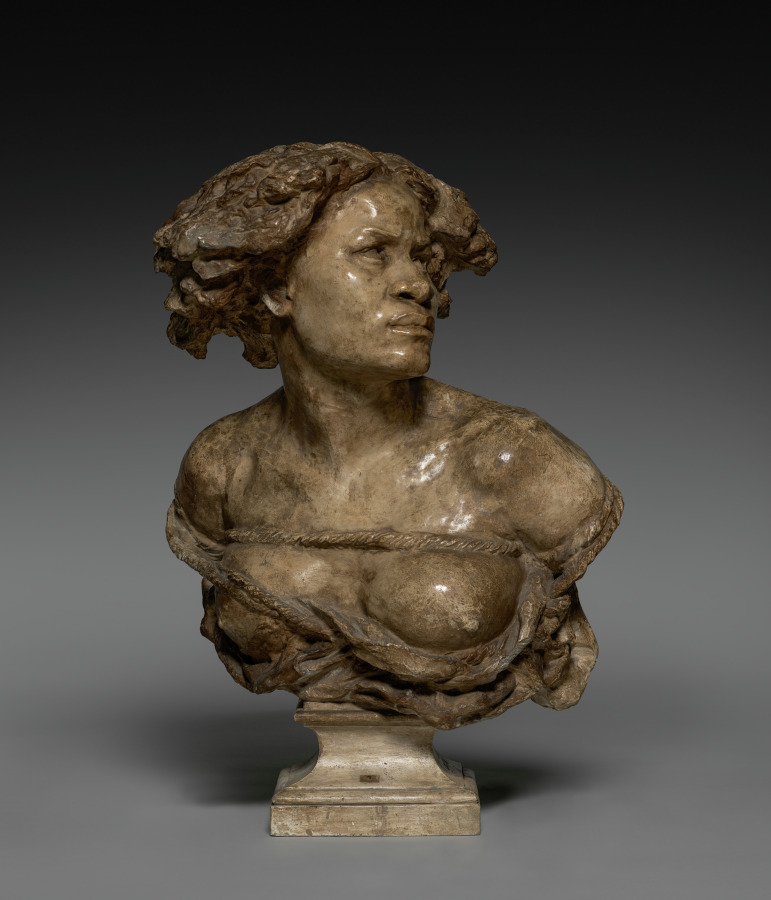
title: Why Born Enslaved!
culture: France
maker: Jean-Baptiste Carpeaux (French, 1827–1875)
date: 1867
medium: Plaster, original polychromed surface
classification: Sculpture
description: One of the most powerful expressions of abolitionist sentiment in the visual arts, Why Born Enslaved! depicts an African woman bound by ropes and looking defiantly upward. The ropes press painfully into her breasts; her torn blouse alludes to the violence responsible for her condition. The original, polychromed surface is covered with complex, nuanced hatchings and subtle modeling. Evidence indicates that this masterpiece of 19th-century French sculpture served as the master model for numerous casts in other museum collections.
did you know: Although officially abolished in France since 1848, slavery remained a hotly contested issue in Carpeaux’s time as it remained legal or tolerated in various countries around the world.